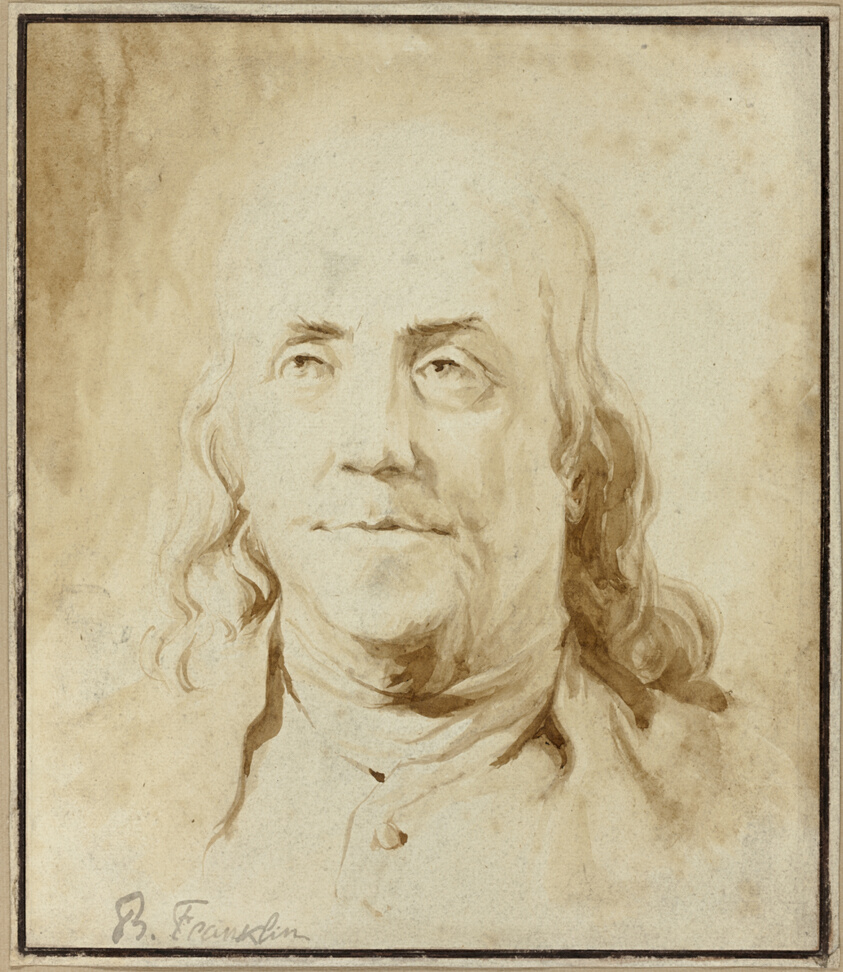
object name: Drawing and Watercolor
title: Benjamin Franklin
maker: Jean-Honoré Fragonard; French, 1732-1806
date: c. 1778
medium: Brush and brown ink and brown wash on ivory laid paper, laid down on ivory laid paper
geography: France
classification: ink or chalk wash; drawings (visual works); prints and drawing